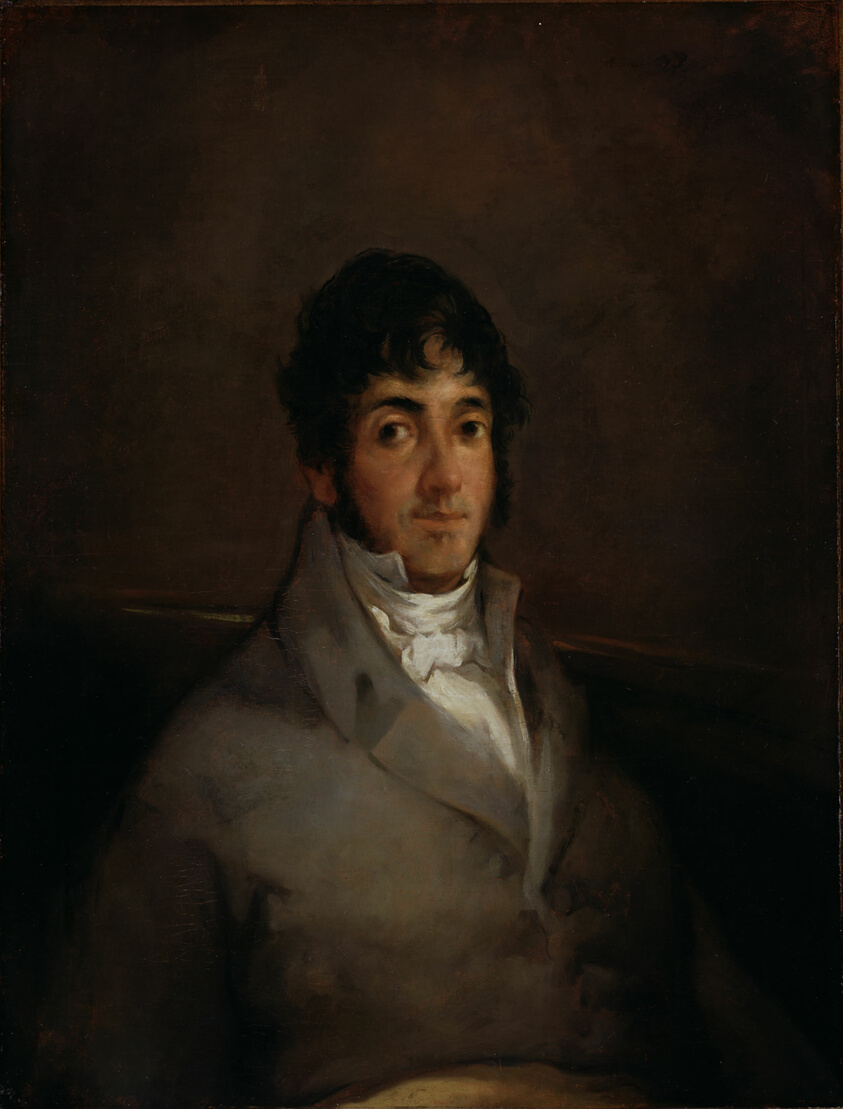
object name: Painting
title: Portrait of Isidoro Maiquez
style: nineteenth century, 19th century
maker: Francisco José de Goya y Lucientes (Spanish, 1746–1828)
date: c. 1807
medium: Oil on canvas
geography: Spain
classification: painting; oil on canvas; oil paintings (visual works); paint; portrait; spanish; european painting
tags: portraits: male subject, brown (color), man, portraits: Spanish subject, portraits, portrait